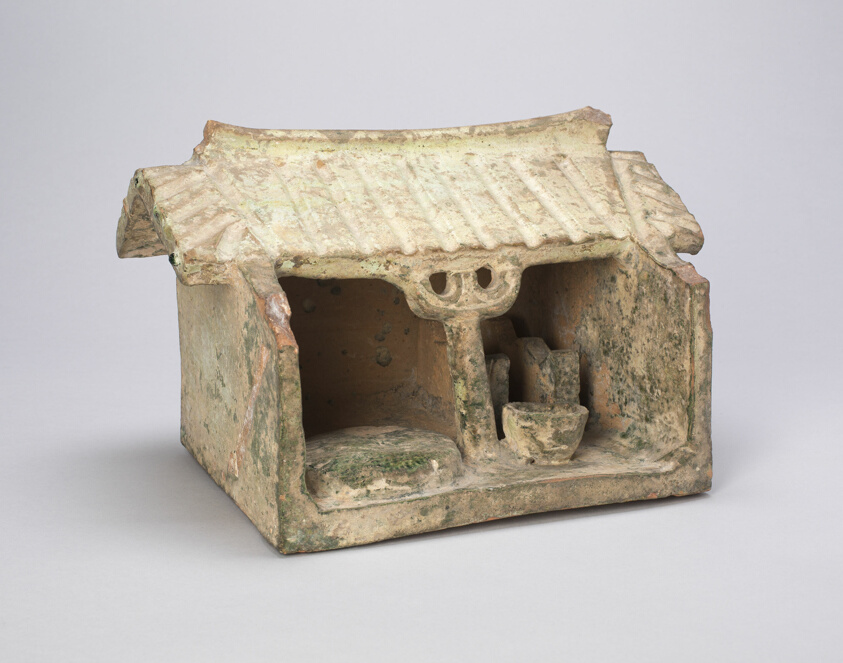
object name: Sculpture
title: Farm Shed with Grain Mill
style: Chinese (culture or style)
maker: China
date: Eastern Han dynasty (25–220 CE)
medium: Brick-red earthenware with green lead glaze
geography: China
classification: earthenware; ceramics; sculpture; asian art